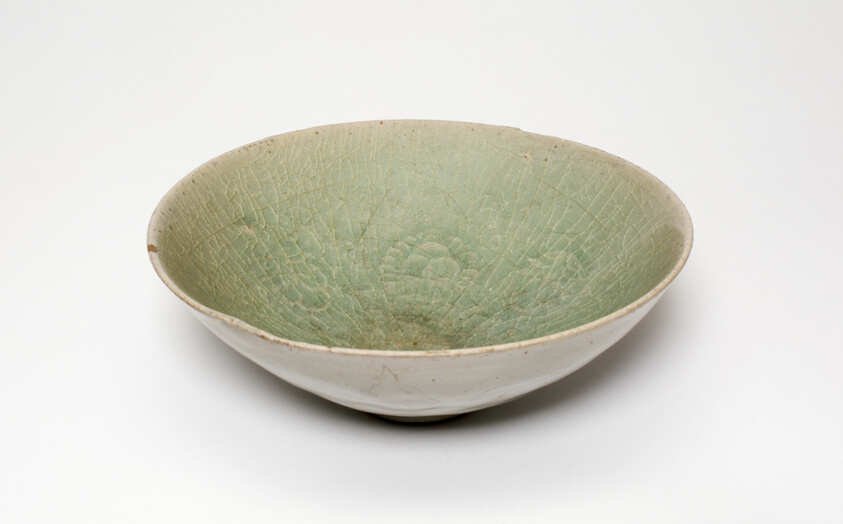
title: Bowl with Peony Flowers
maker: Korea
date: Goryeo dynasty (918–1392)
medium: Celadon-glazed stoneware with underglaze molded decoration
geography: Korea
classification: ceramics; asian art